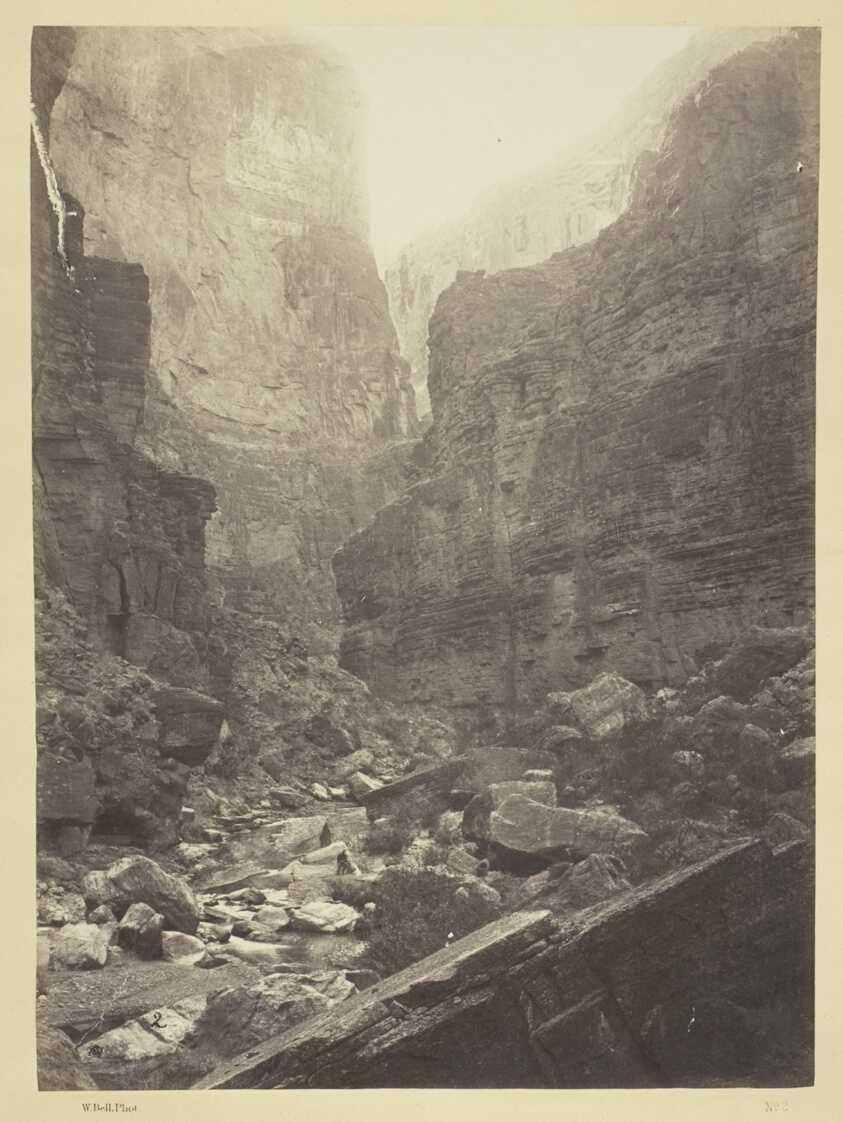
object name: Photograph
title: Cañon of Kanab Wash, Colorado River, Looking North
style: 19th century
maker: William H. Bell (American, 1830–1910)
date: 1872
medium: Albumen print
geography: United States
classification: albumen print from collodion negative; photograph; photography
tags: Collected by Hugh Edwards